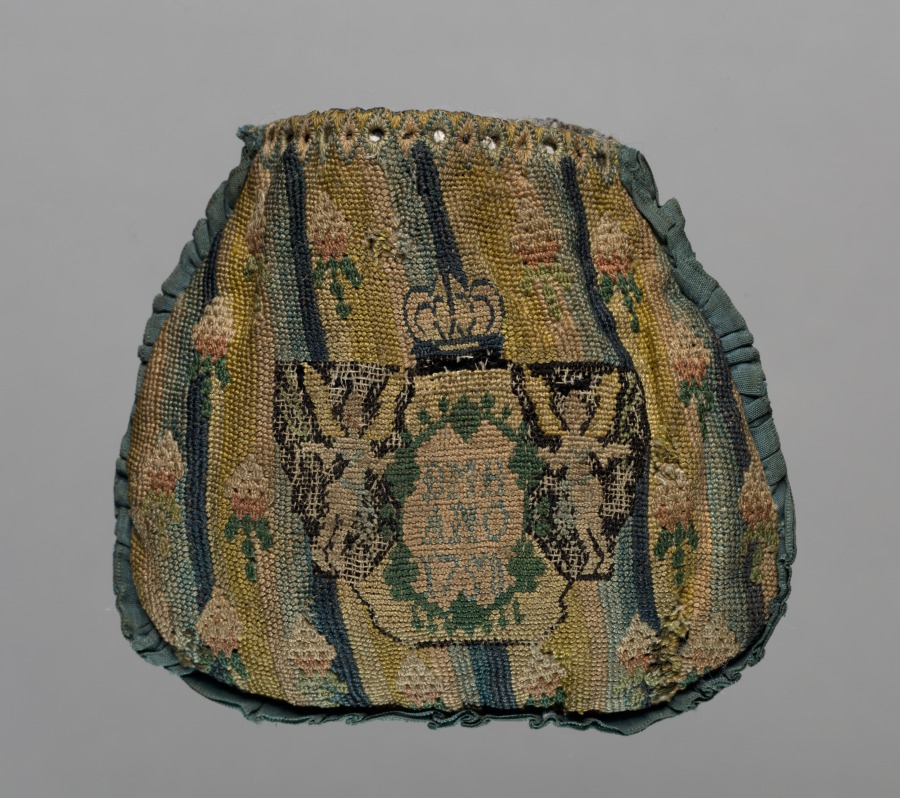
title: Purse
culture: Sweden, 18th century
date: 1710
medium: Needlework, silk?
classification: Embroidery